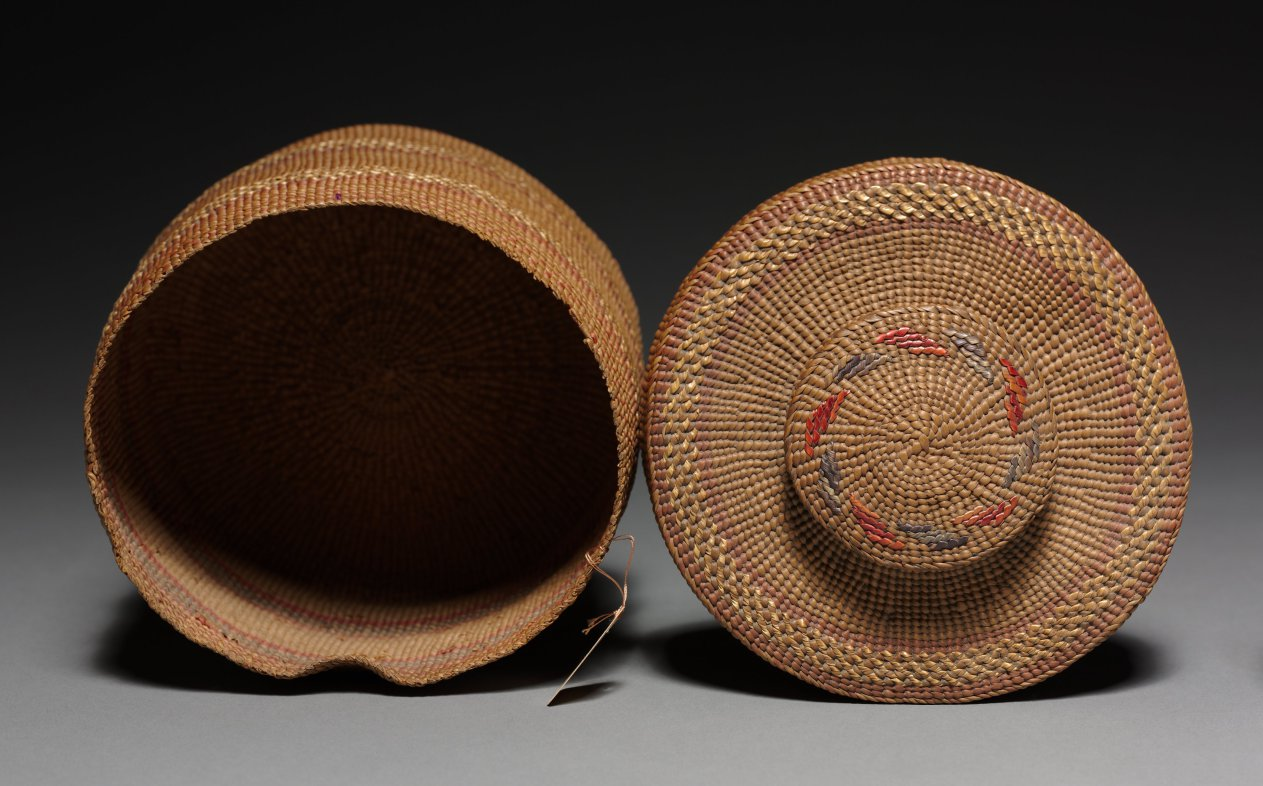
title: Covered Basket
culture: Northwest Coast, Haida, Unassigned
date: Unassigned, before 1917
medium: twilled, imbricated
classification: Basketry